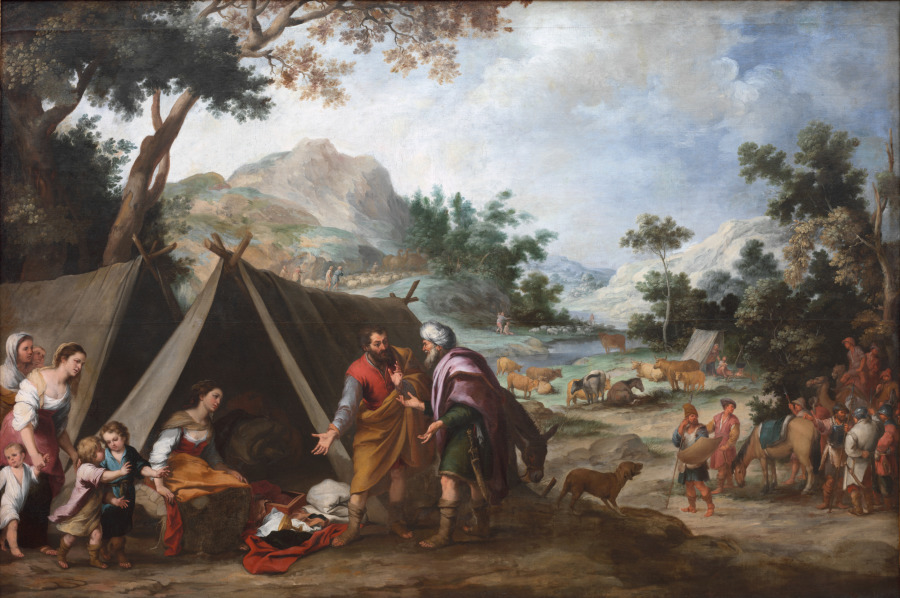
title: Laban Searching for His Stolen Household Gods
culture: Spain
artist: Bartolomé Esteban Murillo (Spanish, 1617–1682)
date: c. 1665–70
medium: oil on canvas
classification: Painting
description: This story comes from the Old Testament book of Genesis and stresses the value of reconciliation. Jacob lived with his uncle Laban for years, marrying Laban’s daughters Rachel and Leah. When the relationship between the men soured, Jacob and his family departed, while Rachel secretly stole her father’s household gods. When Laban discovered that the statues were missing, he pursued Jacob, accusing him of theft. Here, Jacob invites Laban to search his tent, while Rachel sits on the saddlebag containing the statues. After coming up empty-handed, Laban proposes a truce, ending the squabble.